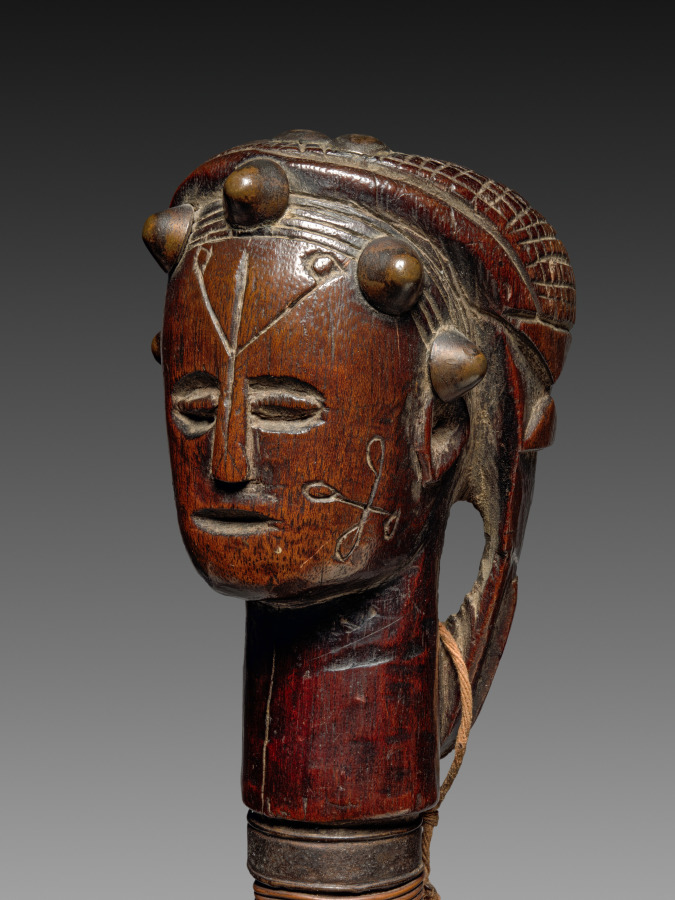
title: Scepter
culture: Africa, Central Africa, Angola, Ovimbundu-style maker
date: late 1800s or early 1900s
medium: Wood, copper alloy, upholstery studs, iron alloy, and cotton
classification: Implements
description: Staffs and scepters as well as tobacco pipes and mortars are among the most important sculptural creations to stem from the Ovimbundu peoples, a Central African culture. All of these object types have associations with ideas of class, status, and power. This scepter has a handle wrapped in thin copper wire that forms wide bands of alternating metal and wooden passages. Its finial is a human head whose carved headdress or hairstyle is ornamented with round-headed metal tacks.